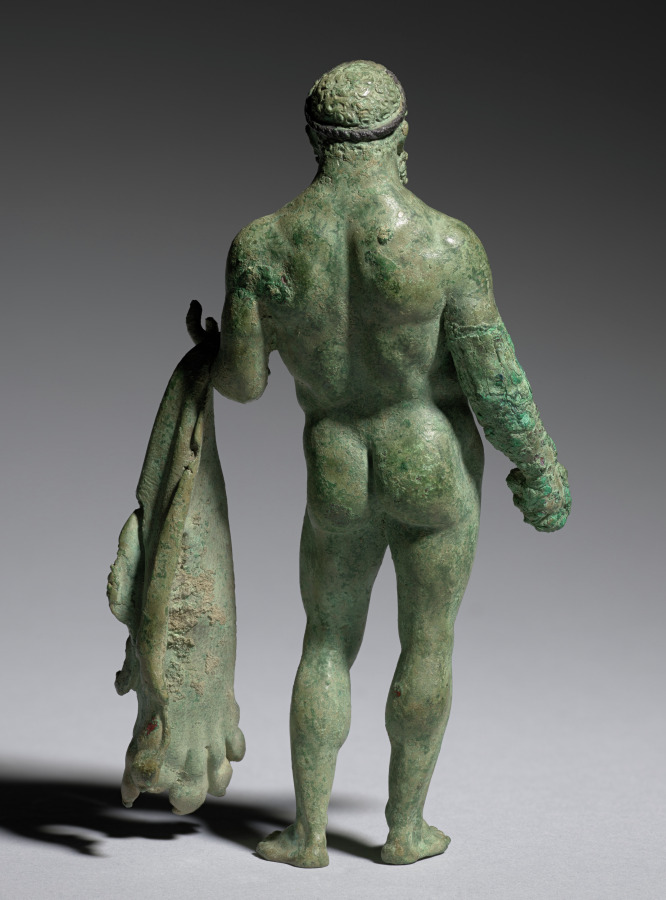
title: Hercules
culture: Italy, Rome, Early Imperial period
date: c. 30 BCE–20 CE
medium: bronze with silver and copper inlays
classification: Sculpture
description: This bronze statuette is a nude figure of the hero Hercules. He stands in a contrapposto pose, with the majority of his weight on one leg. Over his left arm, Hercules holds the skin of the Nemean Lion, having slayed the beast as part of his Twelve Labors and now carrying the pelt as a trophy. Although now mostly lost, Hercules once held his signature wooden club in his right hand. Roman artists often portrayed Hercules as middle-aged, as though greater maturity would increase his power and virility.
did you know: Hercules is the Roman name for the classical hero known in Greek as Herakles.